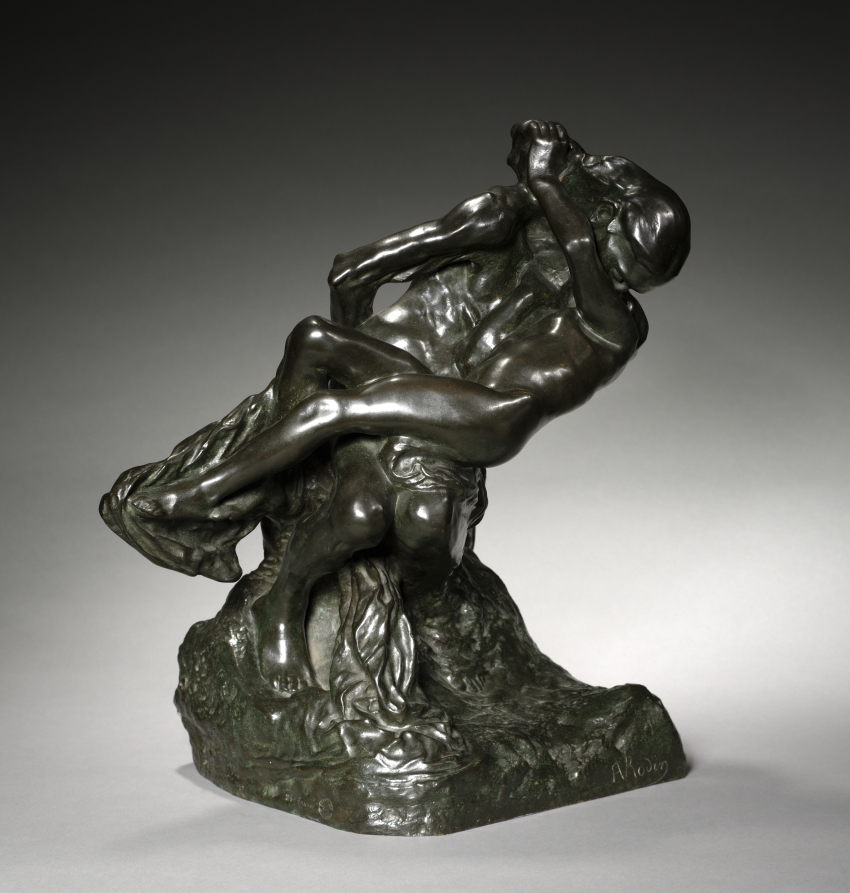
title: Triumphant Youth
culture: France, 19th century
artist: Auguste Rodin (French, 1840–1917)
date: c. 1894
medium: bronze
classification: Sculpture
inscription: Signed front left: "A. Rodin"